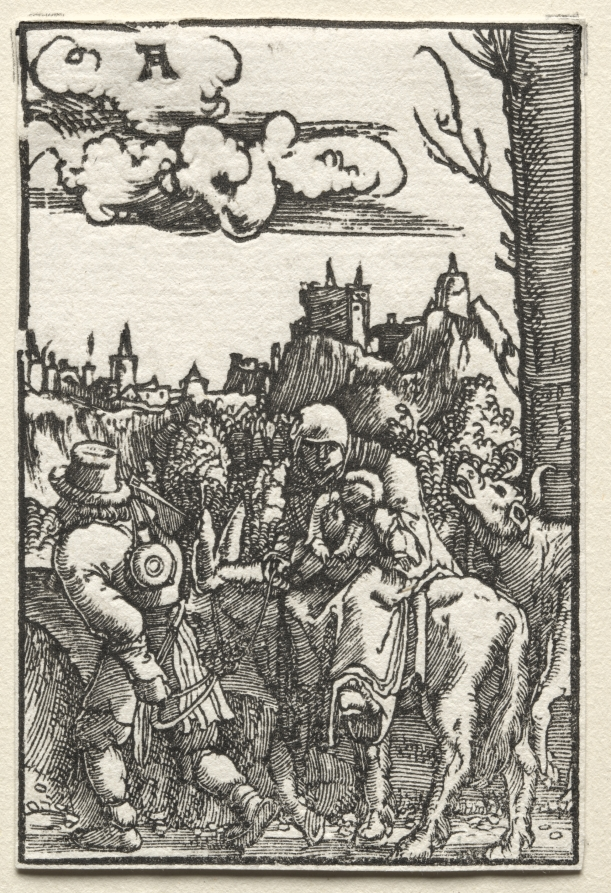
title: The Fall and Redemption of Man: The Flight into Egypt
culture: Germany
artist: Albrecht Altdorfer (German, c. 1480–1538)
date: c. 1515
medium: woodcut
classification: Print